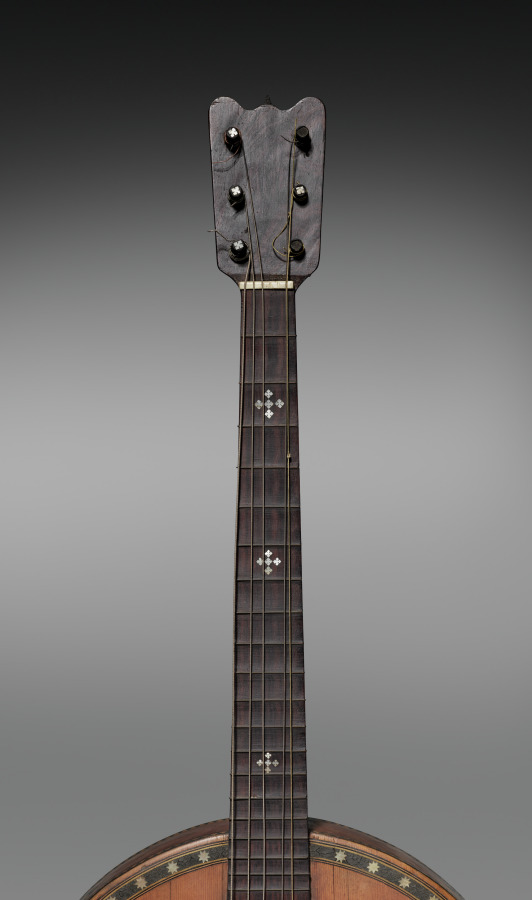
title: Guitar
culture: Italy, 19th century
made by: probably by Fernando Theze (Italian)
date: c. 1860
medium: wood, ebonized wood, mother of pearl inlay, resin, bone?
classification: Musical Instrument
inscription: label inside reads: "Faite a Turin par F. Theze--Amateur."